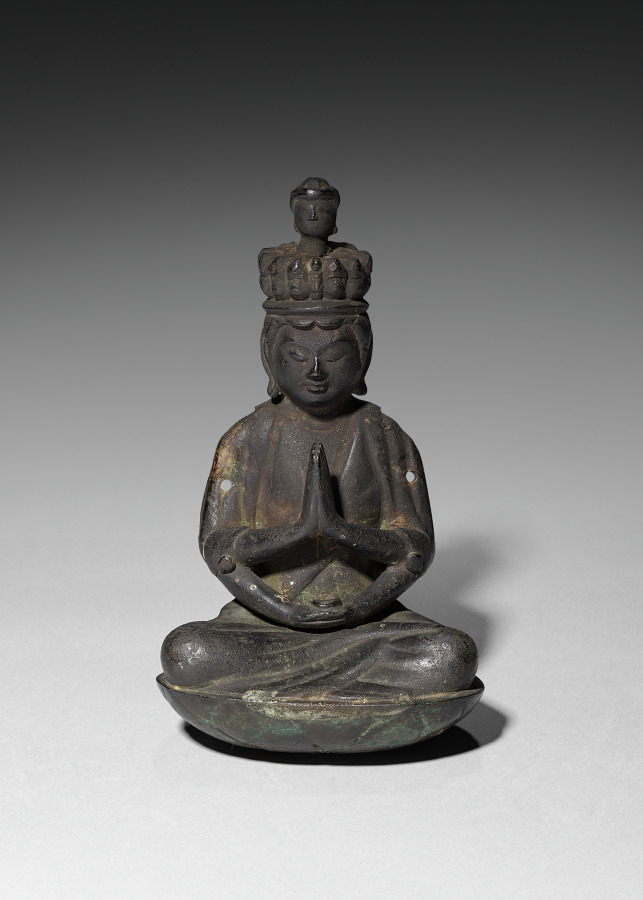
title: Eleven-Headed Kannon (Jūichimen Kannon)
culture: Japan, Heian period (794–1185) to Kamakura period (1185–1333)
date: 1100s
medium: bronze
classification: Sculpture